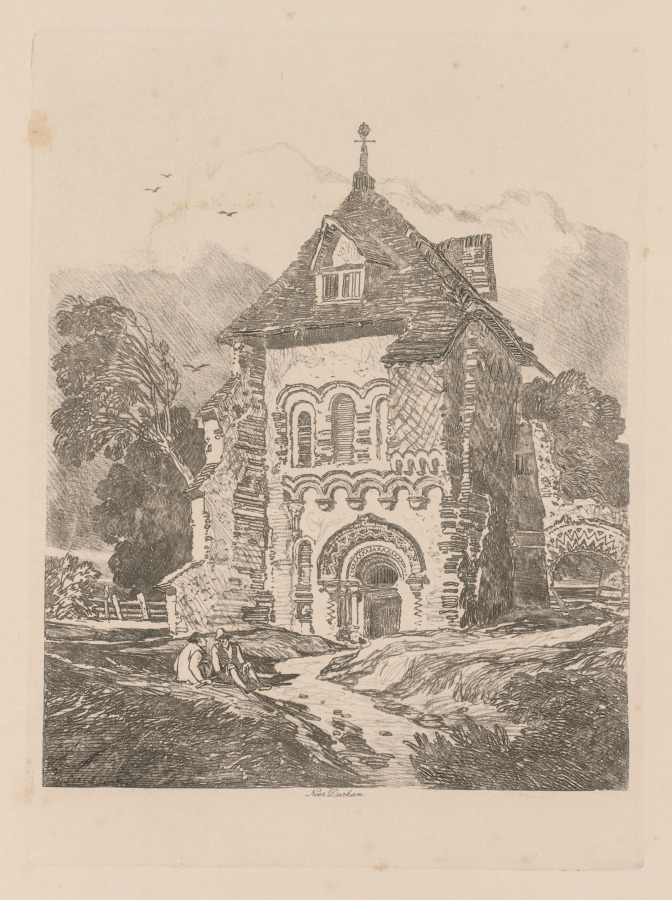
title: Liber Studiorum: Plate 36, Church near Durham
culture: England, 19th century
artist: John Sell Cotman (British, 1782–1842)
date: 1838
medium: softground etching, from a bound volume containing 48 plates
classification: Bound Volume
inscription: In plate, within image, upper right: 36; in plate, below image: Near Durham